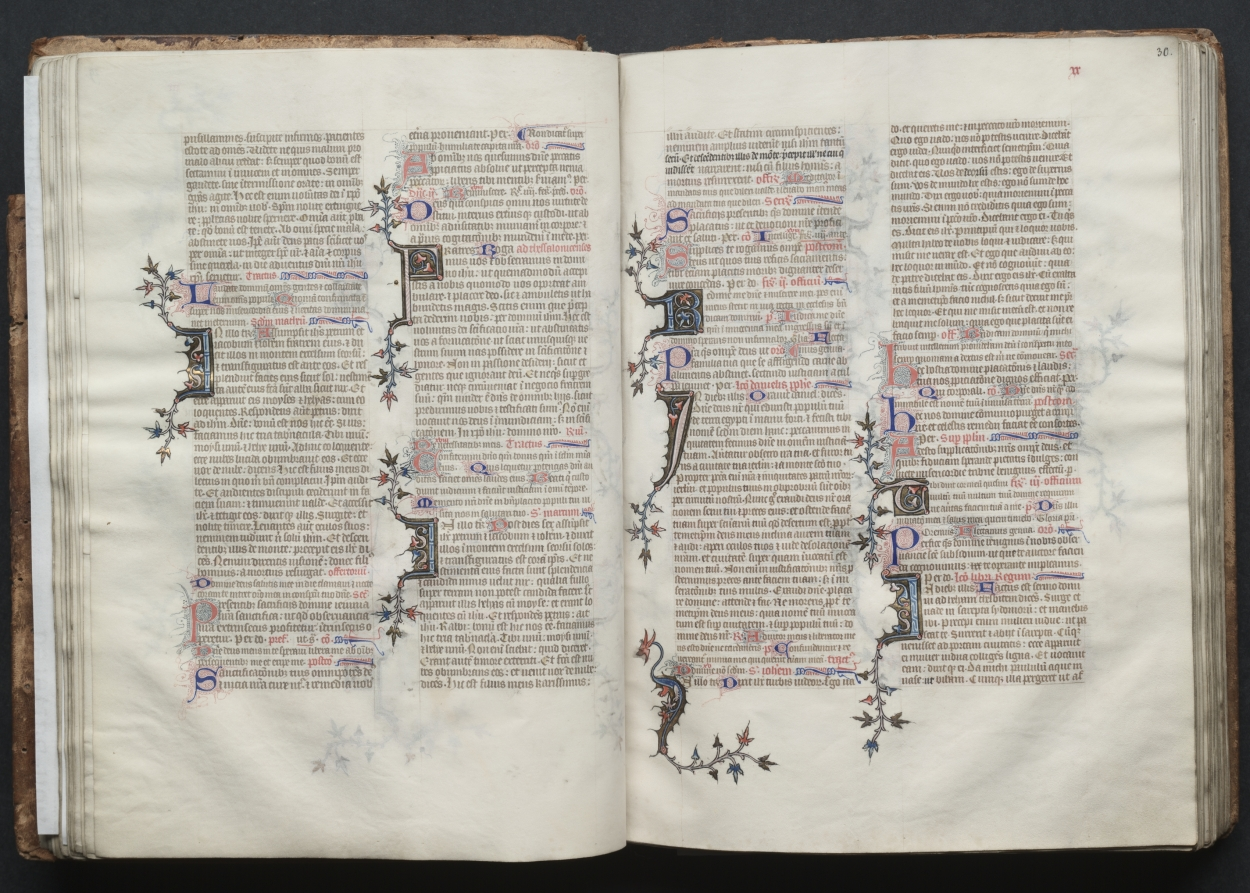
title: The Gotha Missal: Fol. 30r, Text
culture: France, Paris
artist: Master of the Boqueteaux (French)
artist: and Workshop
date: c. 1375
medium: ink, tempera, and gold on vellum; blind-tooled leather binding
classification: Bound Volume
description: The style and quality of this manuscript's decoration is typical of deluxe Parisian books made for aristocratic or royal patrons. Most of the book's decoration appears to be the work of the Master of the Boqueteaux, an artist active at the court of King Charles V (died 1380). His style was apparently shared by a number of book illuminators working in and around Paris. It is very possible that the Gotha Missal belonged to Charles V, but is not provable because the manuscript has no royal portraits and lacks a colophon. Given the book's magnificent decoration, however, it would seem that it was produced for a Valois prince, if not for the king himself. The manuscript receives its name from the German dukes of Gotha, its later owners.